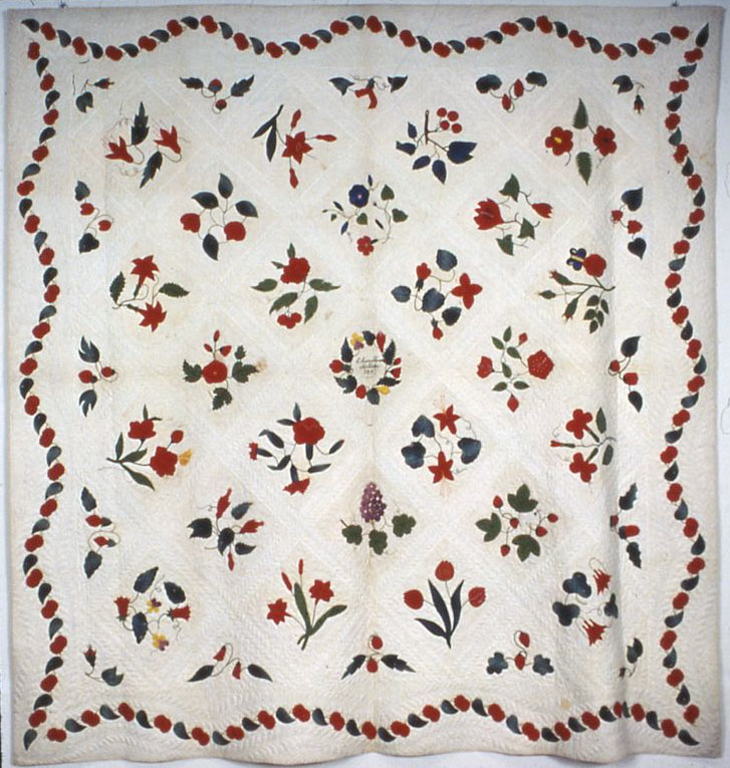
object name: Textile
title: Bedcover (Flowers and Fruit Bedcover)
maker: United States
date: 1847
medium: Cotton, plain weave, pieced and quilted; aplliquéd with cotton, plain weave, printed; embroidered in wool threads in a variety of stitches; backed with cotton, plain weave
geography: United States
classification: textile; needlework - quilt